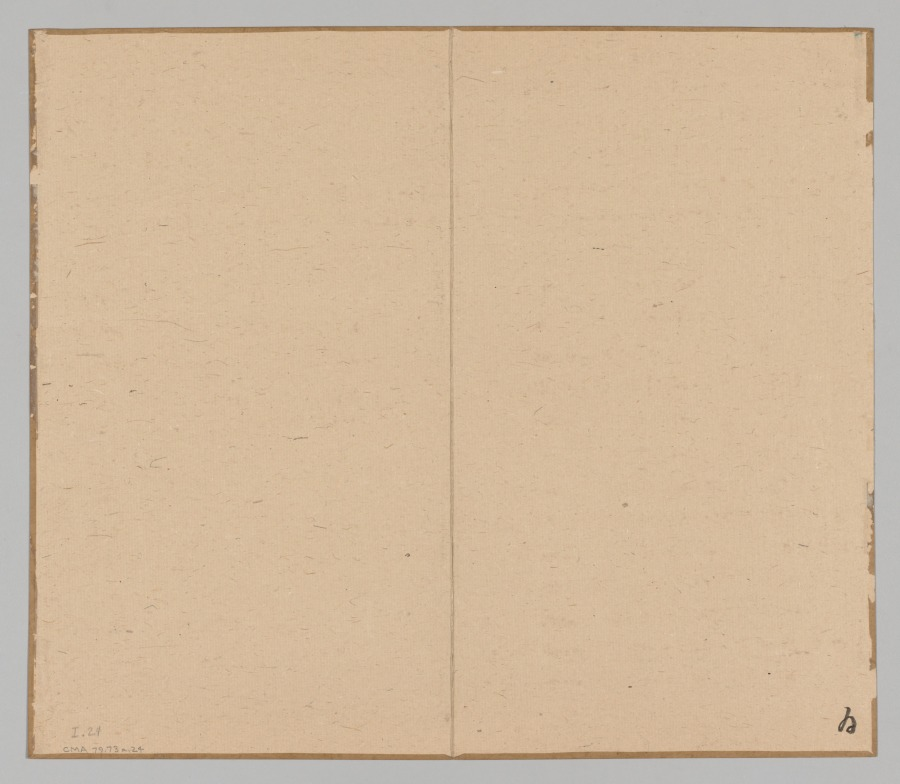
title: Reverberations of Taiga, Volume 1 (leaf 24)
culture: Japan, Edo period (1615–1868)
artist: Aoki Shukuya (Japanese, d. 1802)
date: mid- to late 1700s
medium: double-leaf from a pair of albums; ink and light color on paper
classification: Portfolio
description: Traditionally, young painters in Japan began their studies with an established master-painter. The master's compositions invariably became models that the apprentice copied to learn various ink and brush techniques. Shukuya was a pupil of the famous Kyoto artist Ikeno Taiga, whose style is reflected in these sketches of rocks, trees, and mountains.